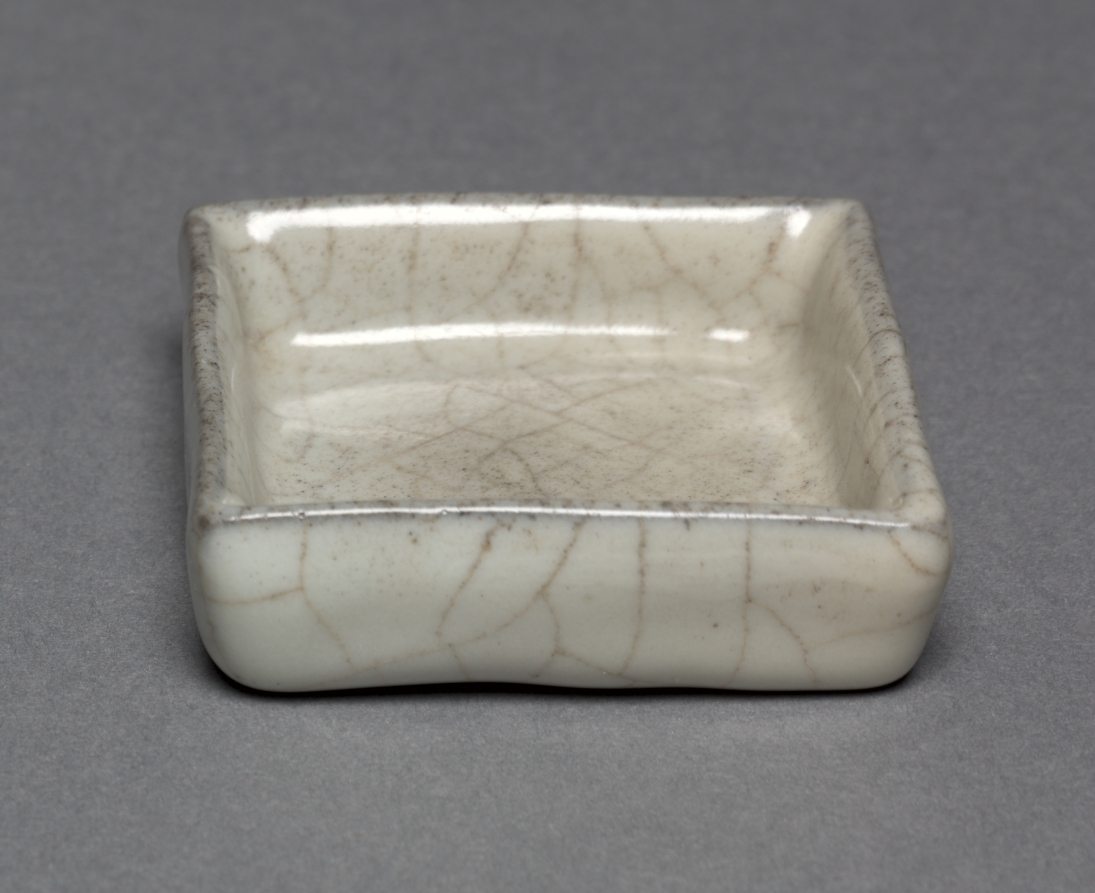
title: Square Brush Washer: Guan ware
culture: China, Hangchou, Suburban Altar Kiln, Southern Song dynasty (1127-1279)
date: 1127–1279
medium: glazed stoneware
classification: Ceramic